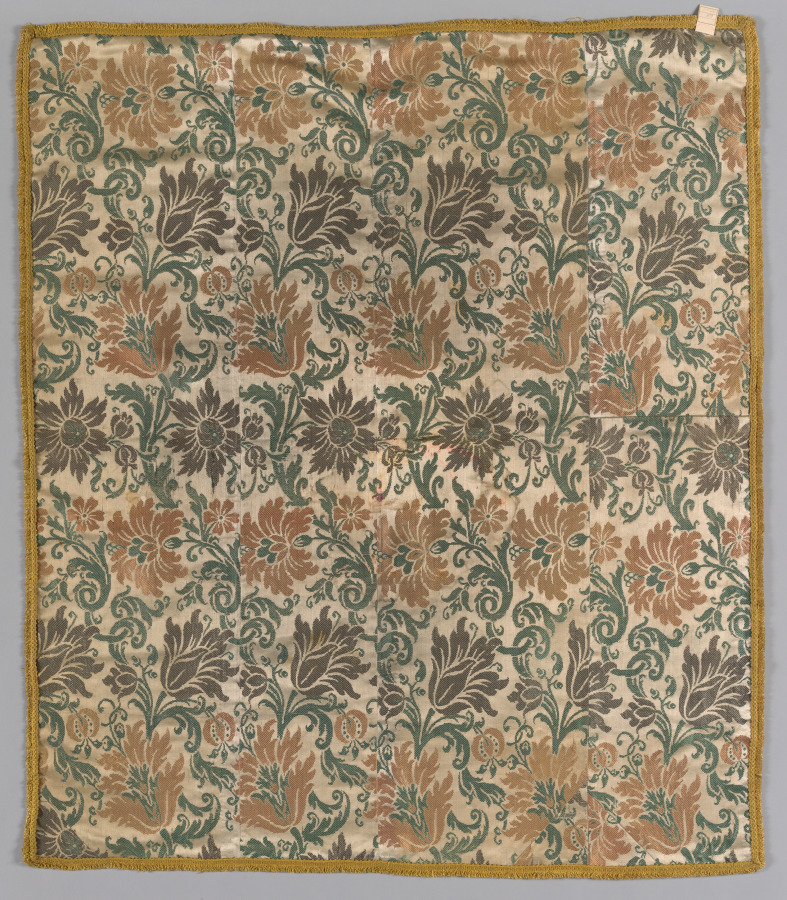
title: Silk Textile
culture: Italy, 17th century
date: 17th century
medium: silk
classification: Textile